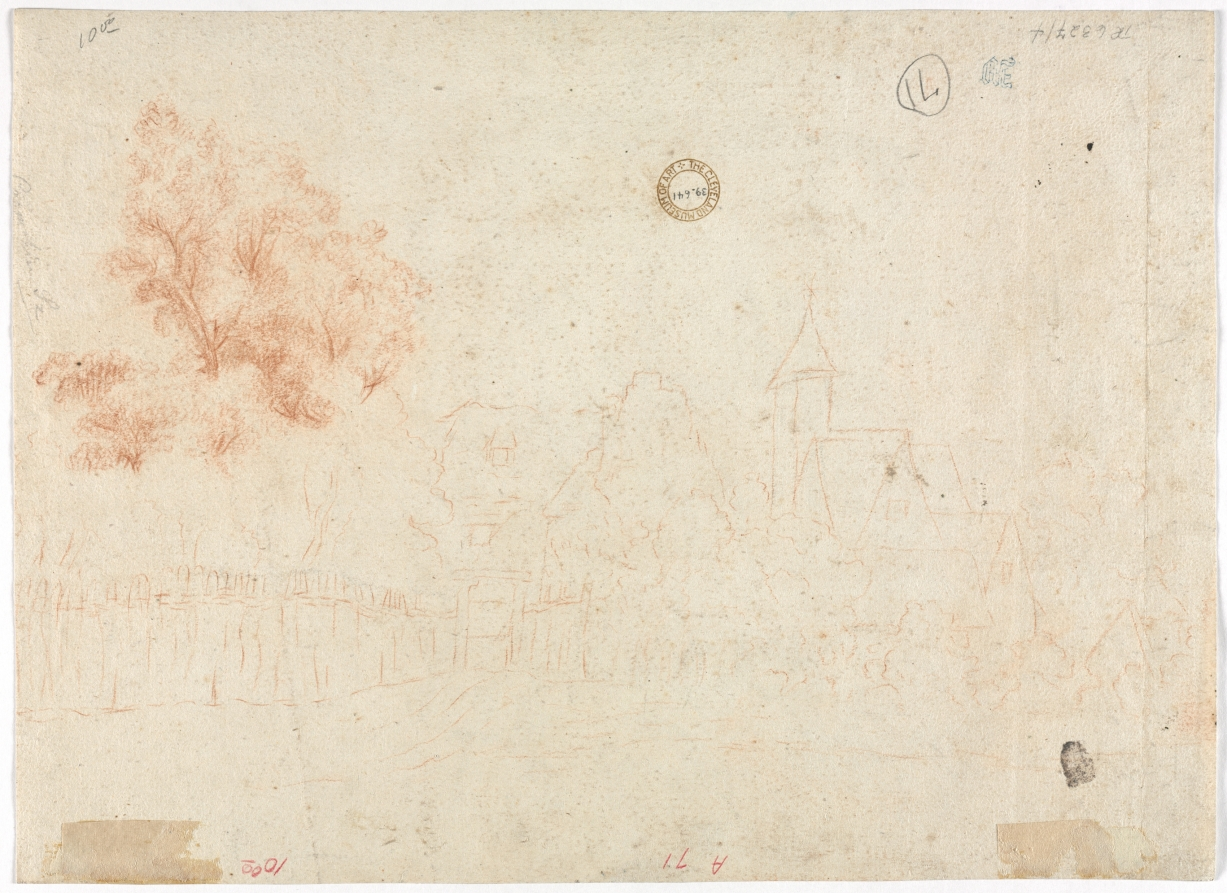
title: Sketch of a Village (verso)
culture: France, 18th century (?)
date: 18th century?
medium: red chalk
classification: Drawing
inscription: upper left, in graphite: 10ºº ; upper right, in graphite: 71 [circled] [upside down] ; upper left, along left edge, in graphite: [Cornelius?] Sr [Sr underlined] ; lower left, in red pencil: 10ºº [upside down] ; lower center, in red pencil: A 71 [upside down]